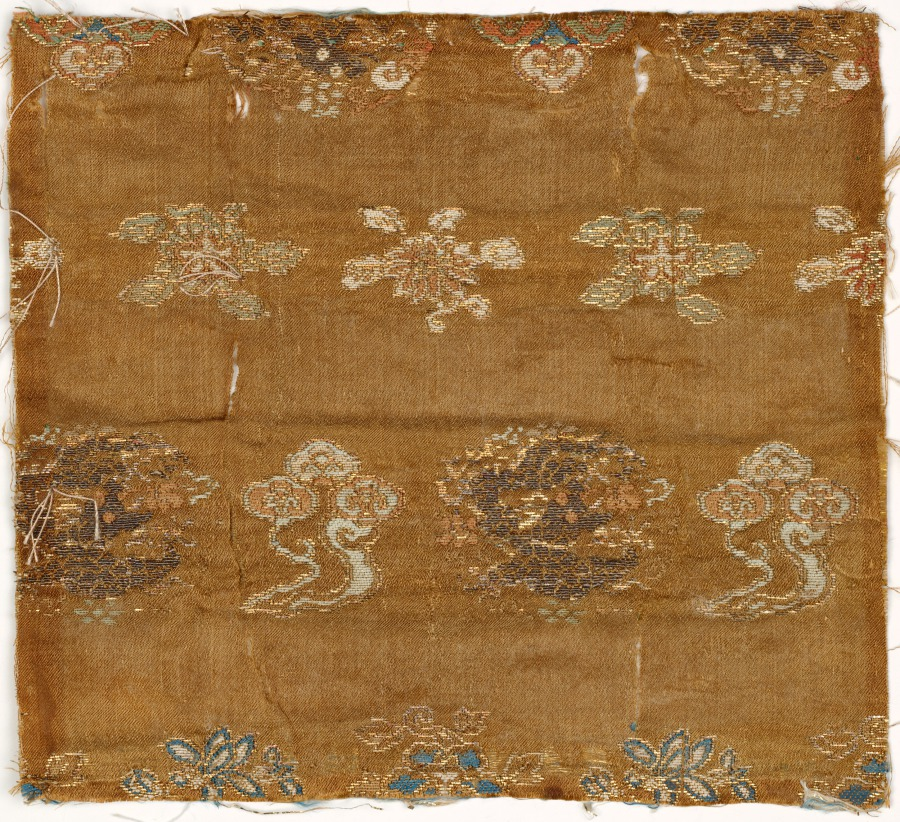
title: Fragment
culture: China, early 18th century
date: early 1700s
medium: brocaded satin; silk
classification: Textile